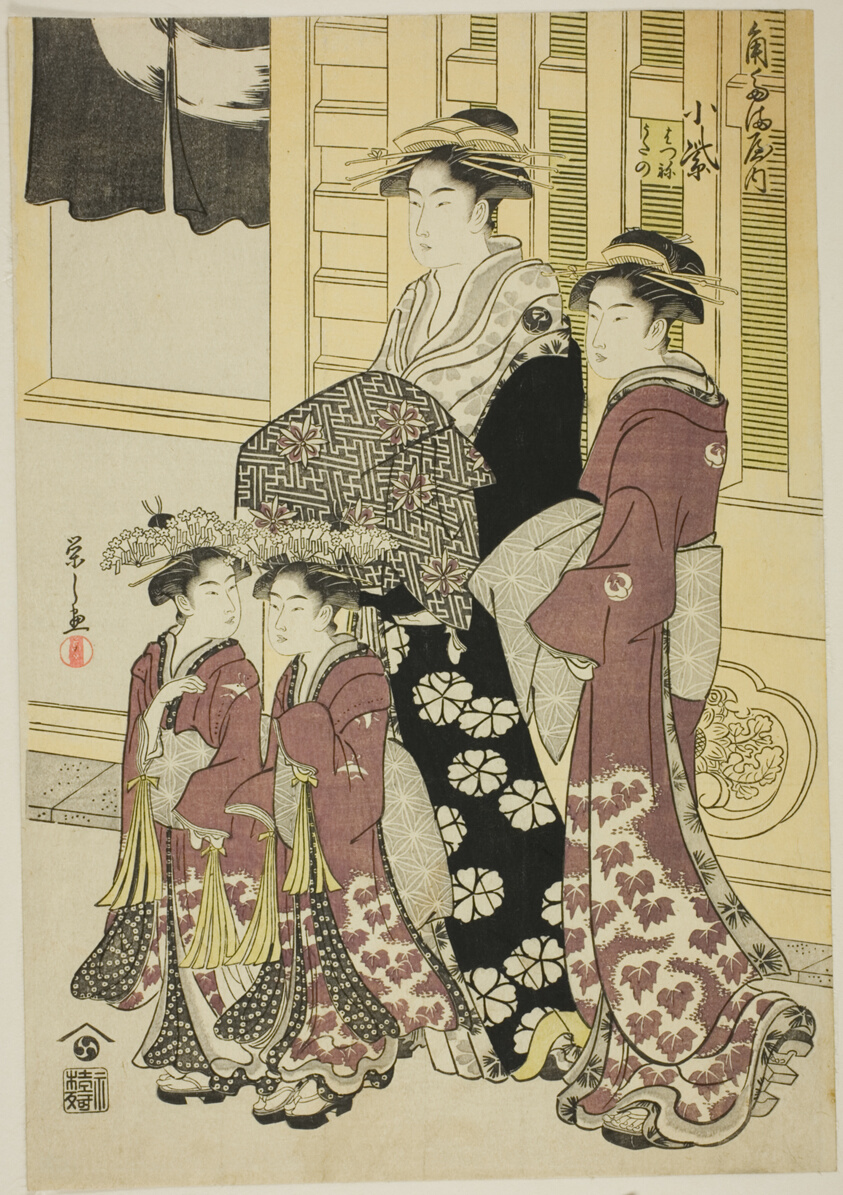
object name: Print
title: Komurasaki of the Kadotamaya with Attendants Hatsune and Utano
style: Japanese (culture or style)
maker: Chobunsai Eishi; Japanese, 1756-1829; Publisher: Hibino Yohachi; Japanese, unknown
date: c. 1790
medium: Color woodblock print; oban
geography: Japan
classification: woodblock print; print; asian art